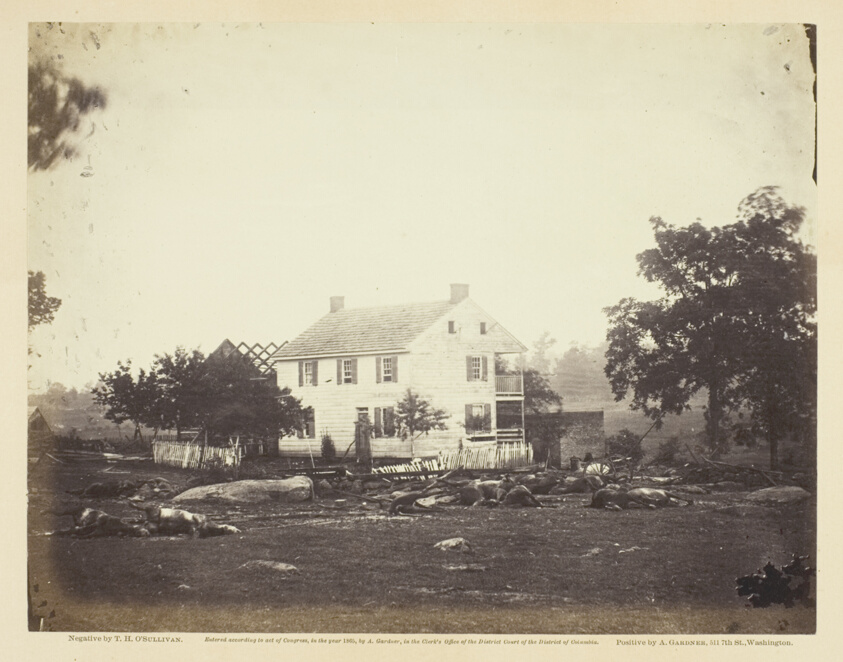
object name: Photograph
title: Trossell's House, Battle-Field of Gettysburg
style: 19th century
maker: Timothy O'Sullivan (American, born Ireland, 1840–1882)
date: July 1863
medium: Albumen print, pl. 42 from the album "Gardner's Photographic Sketch Book of the War, vol. 1" (1866)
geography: United States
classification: photograph; albumen silver print; photography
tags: Collected by Hugh Edwards, Gardner's Photographic Sketch Book